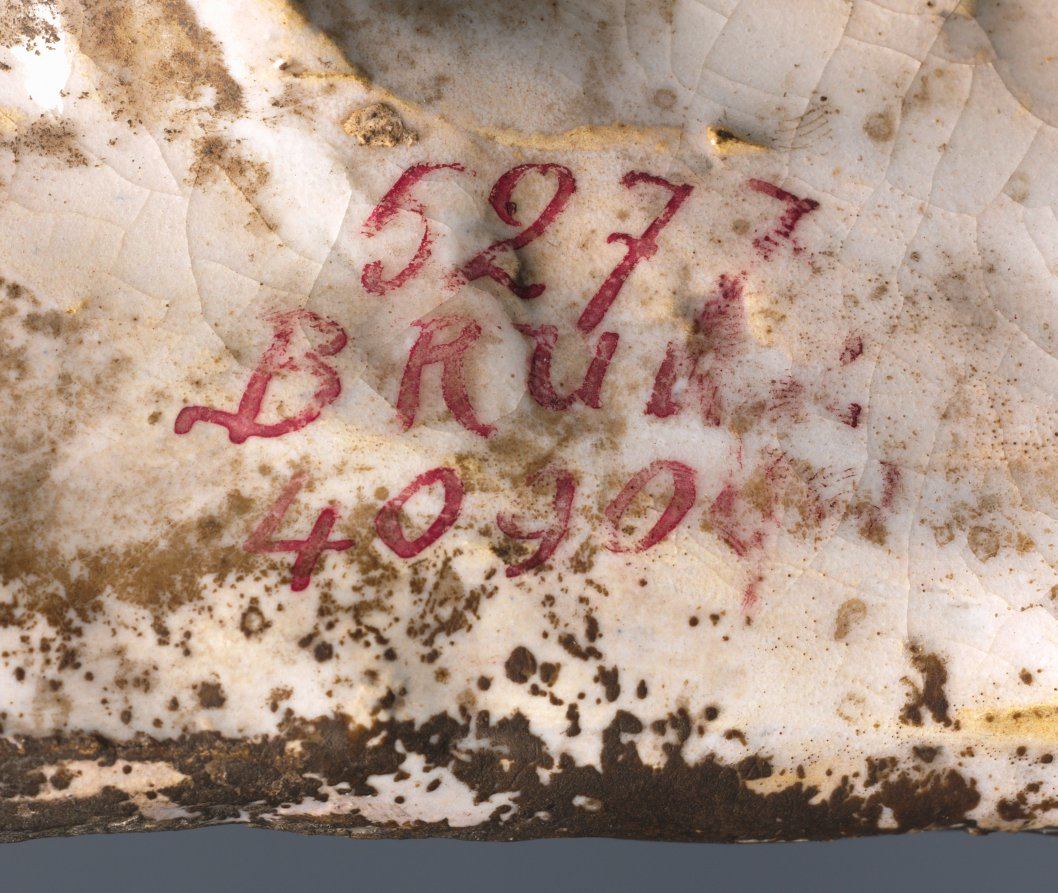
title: The Entombment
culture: Italy, Faenza, 15th century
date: late 1400s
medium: glazed terracotta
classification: Ceramic